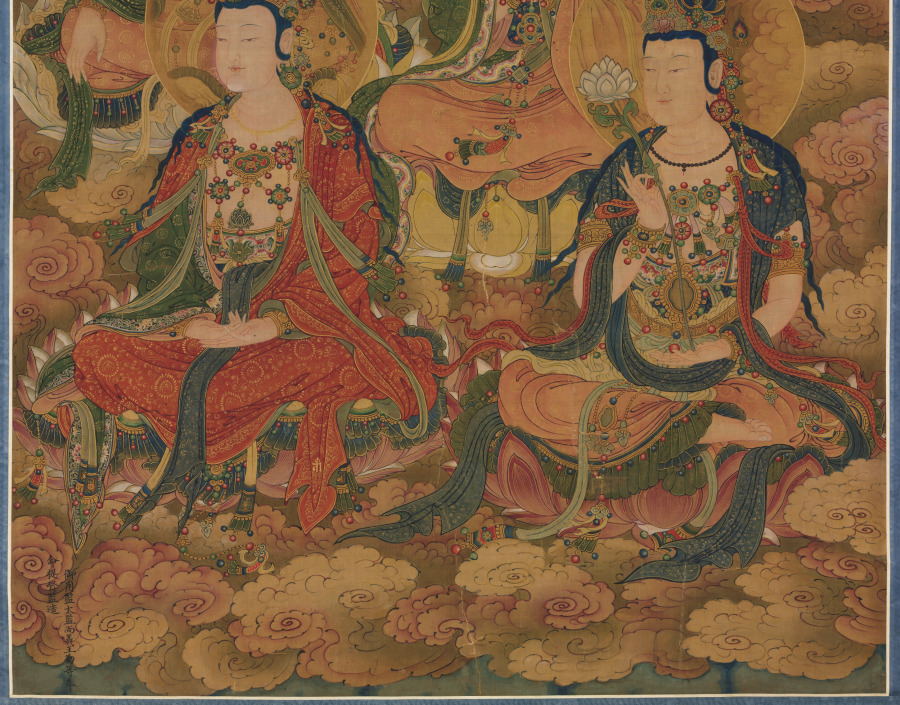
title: The Bodhisattvas of the Ten Stages in Attaining the Most Perfect Knowledge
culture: China, Ming dynasty (1368–1644)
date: 1454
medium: hanging scroll; ink and color on silk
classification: Painting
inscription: 大明景泰五年八月初三日施 [印] 廣運之寳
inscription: 御用監太監尚義王勤等奉命提督監造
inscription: 等覺位十地菩薩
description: This painting represents bodhisattvas of the 10 stages of enlightenment undergoing the final processes toward Buddhahood. This and CMA 1973.70.2 form part of a set of scrolls that were used to perform the Water-Land (shuilu) ritual. The sinuous curves of scarf and drapery, the layering of garments, and the minute detail all reflect the opulent visual atmosphere that surrounded the Ming worshipper in temples and spirit halls throughout the country. In the upper right corner of each painting is an imperial seal and an inscription in gold: Donated on the third day of the eighth month in the fifth year of the Jingtai reign (1454) of the Great Ming. Written in ink in the lower left corner is the record that they were made on imperial order, probably to present them to the Da Longfu monastery in Beijing.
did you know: This painting was used in the grandest of the Buddhist mortuary rites, the Water-Land (shuilu) ritual, which was conducted for the salvation of “all souls of the dead on land and sea.”